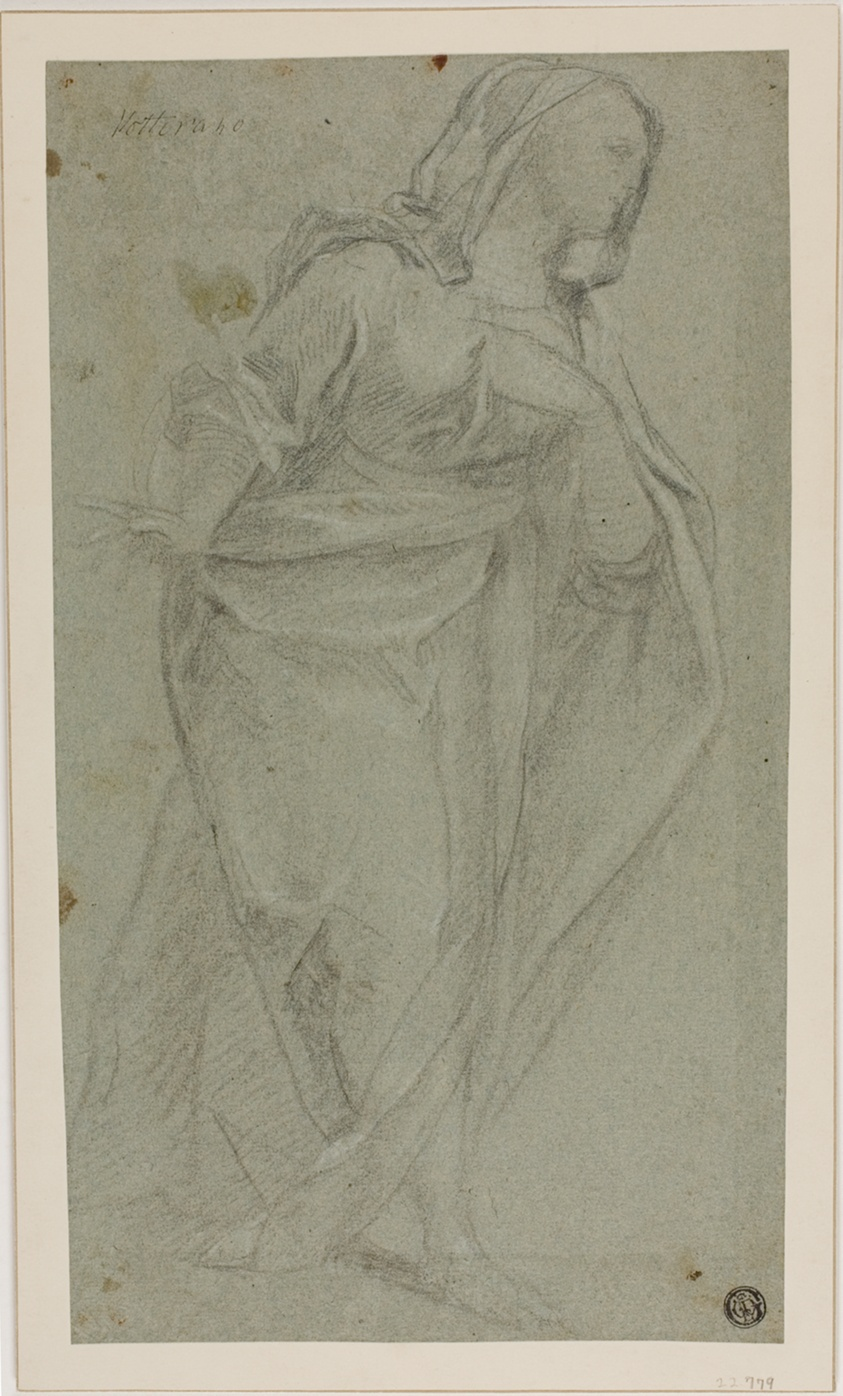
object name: Drawing and Watercolor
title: Standing Draped Female Figure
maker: Baldassare Franceschini, called Il Volterrano; Italian, 1611-1689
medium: Black chalk, heightened with touches of white chalk, on blue-gray laid paper, laid down on cream wove card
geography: Italy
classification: graphite; drawings (visual works); prints and drawing